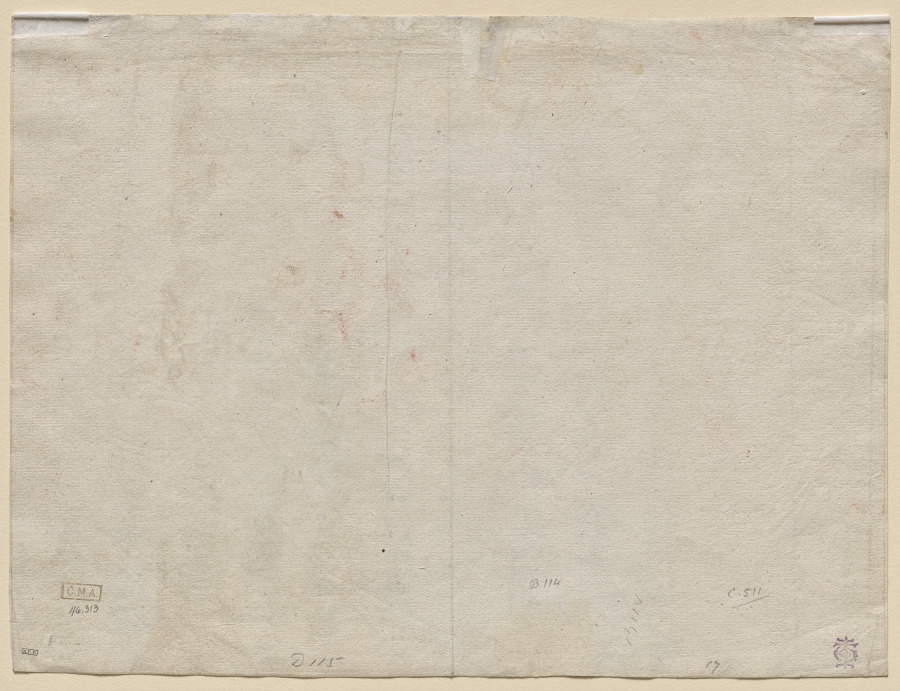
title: The Large Lion Hunt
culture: Netherlands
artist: Rembrandt van Rijn (Dutch, 1606–1669)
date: 1641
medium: etching and drypoint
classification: Print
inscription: upper right, in plate: Rembrandt f / 1941 ; VERSO, lower center, in graphite: D115 ; lower center, in graphite: B. 114 ; lower center, in graphite: B 114[sideways] ; lower right, in graphite: 17 ; lower right, in graphite: C 511[underlined]